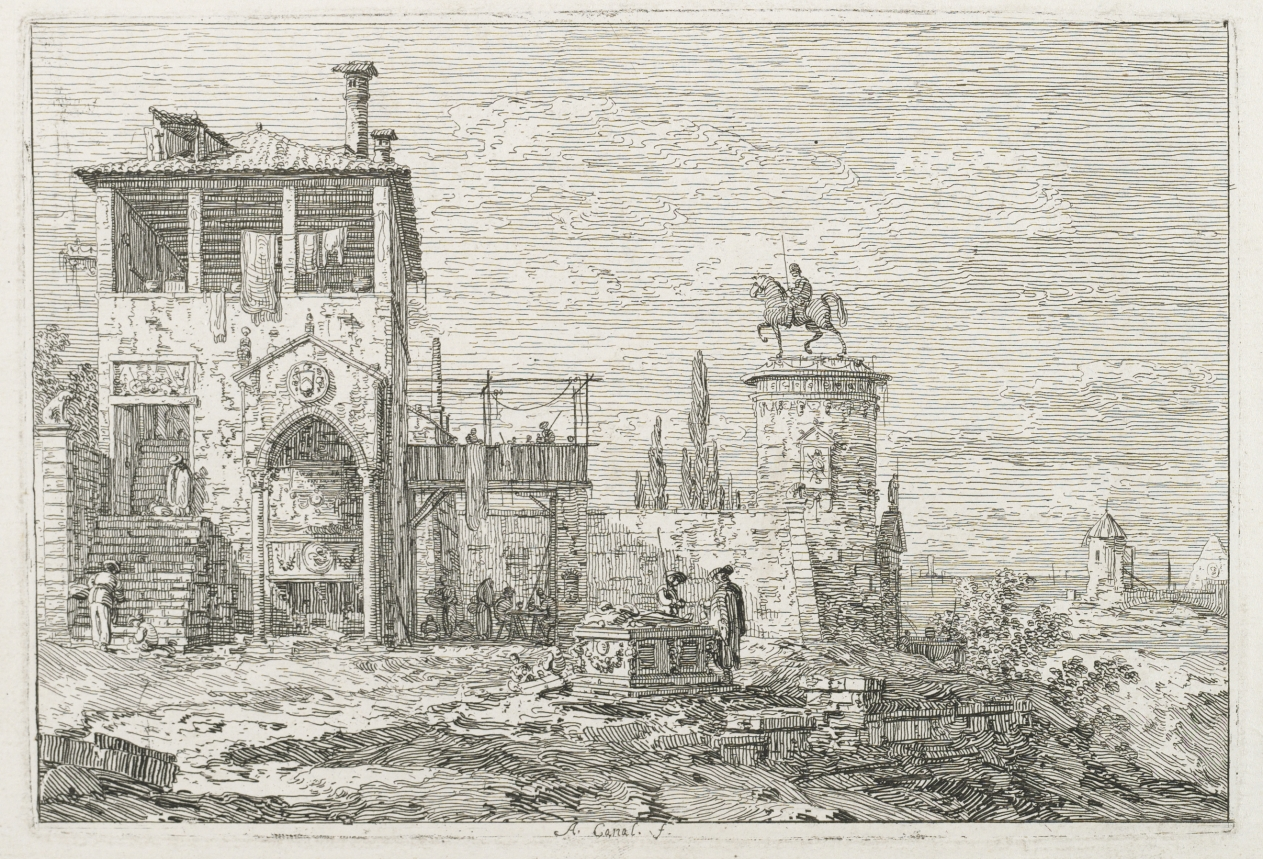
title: Views: The Equestrian Monument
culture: Italy, Venice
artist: Antonio Canaletto (Italian, 1697–1768)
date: 1735–1746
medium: etching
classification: Print